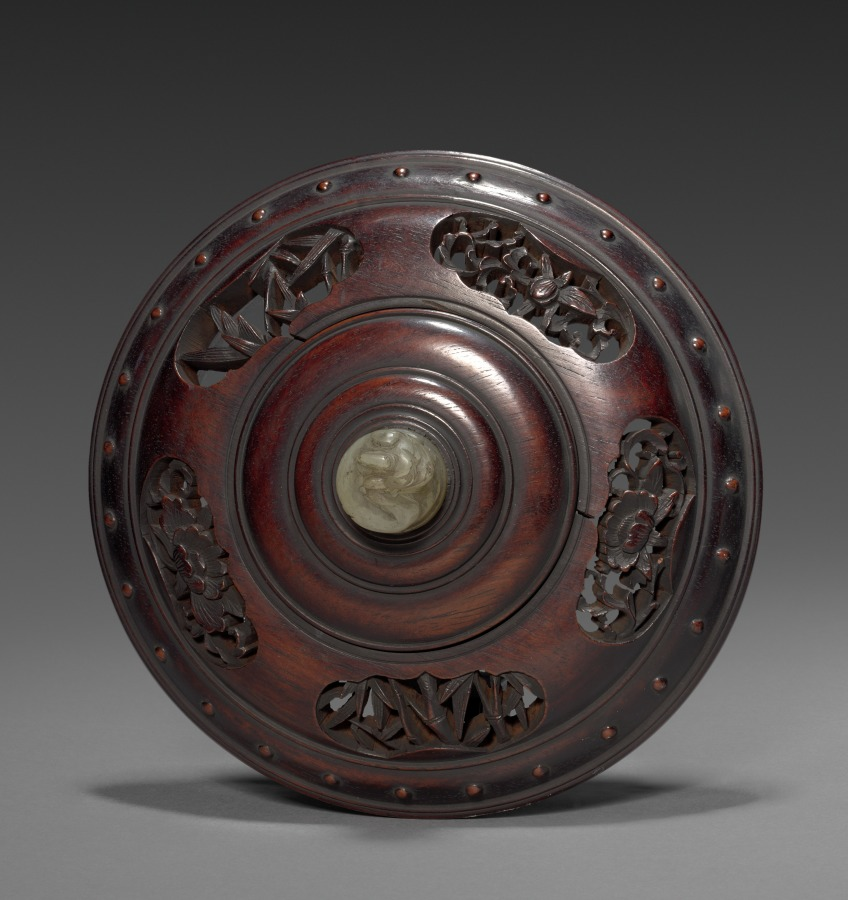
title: Jar ( lid)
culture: Japan, Edo period (1615–1868)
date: early to mid-1800s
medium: teak and carved stone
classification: Ceramic